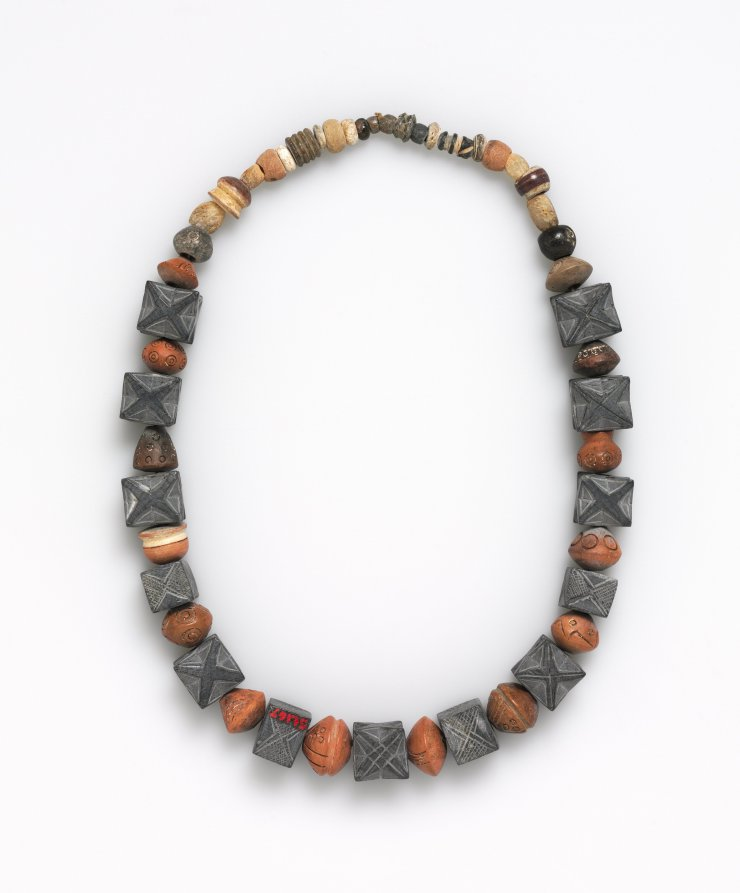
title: Necklace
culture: Peru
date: before 1532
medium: gray beads and wood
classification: Jewelry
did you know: These ancient beads were restrung in modern times.